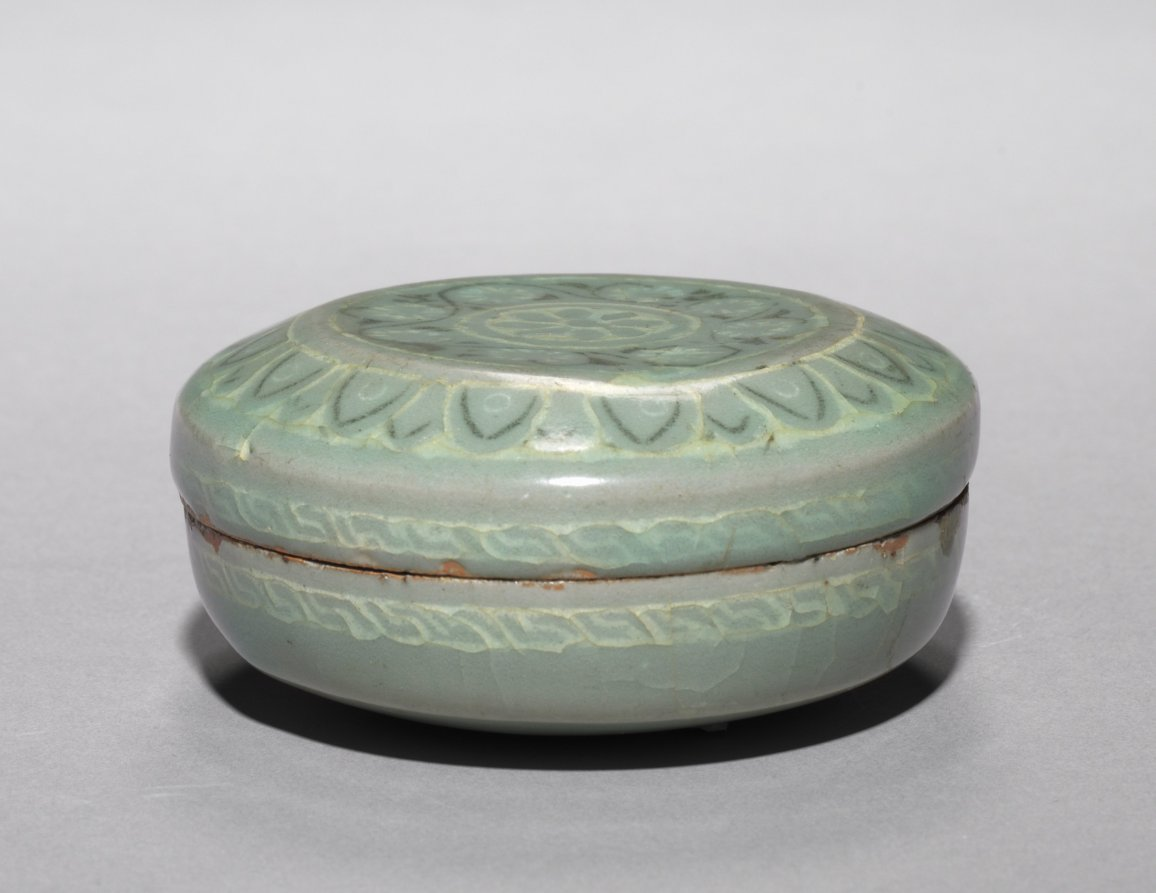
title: Box and Cover with Inlaid Chrysanthemum Design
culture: Korea, Goryeo dynasty (918–1392)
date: 1200s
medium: celadon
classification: Ceramic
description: Celadons, spoons, seals, and bronze mirrors were the most common burial objects in tombs during the Goryeo period (918-1392). Once used to contain color powder, rouge and eyebrow gel for makeup, this small container was one of the standard goods that furnished elites' tombs. Goryeo-period women and men used the grain powder of rice or millet for whitening their skin, safflower extract for rouge, and plant ash or soot for eyebrow gel. Yet, natural-looking make-up seems to have been the most favorable one in Korea according to the travelogue by Xu Jing (1091-1153), the Chinese diplomat who visited Korea in 1123.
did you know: This ceramic container was used to store incense or cosmetics.